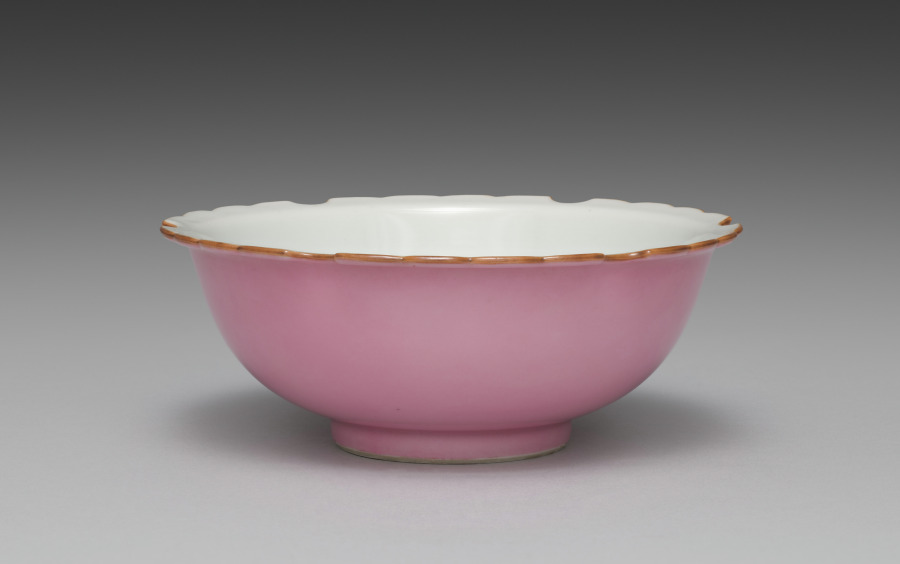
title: Dish from Snow-Flake Side Dishes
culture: Japan, Meiji period (1868–1912)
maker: Seifū Yohei III (Japanese, 1851–1914)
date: 1893–1914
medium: One from a set of six porcelain dishes; porcelain with lobed rims and pink glaze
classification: Ceramic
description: According to the box lid, this set of six side dishes, or mukōzuke, are “snow-flower style” (sekkashiki), having mouths shaped like snowflakes. Their mouths, which have six lobes and scalloped edges, are traced with brown iron oxide at the rim. The outside of each bowl is glazed with a very bright pink over the basin and foot, and the inside is left white. From directly above, one sees a snowflake-like shape, and from the side, they seem to float above a rosy ground.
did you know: The box for this set of dishes has an inscription on the side noting that they were for a person with the family name Nakamoto.